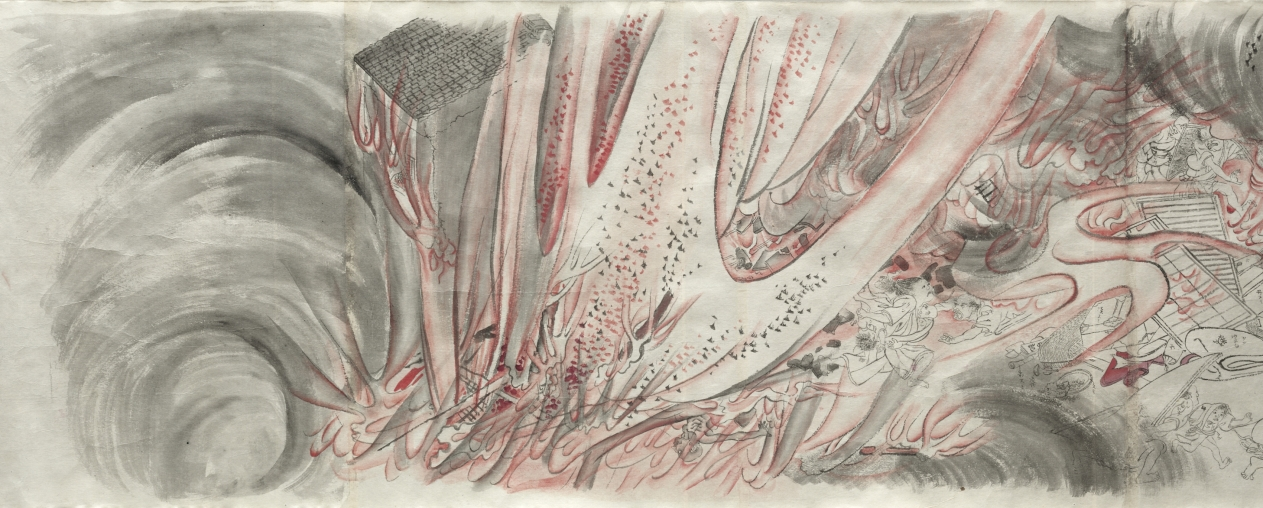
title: Sketch Copy of Natural Disasters, from the Seven Fortunes and Misfortunes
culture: Japan, Edo period (1615–1868) to Meiji period (1868–1912)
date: after 1773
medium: handscroll; ink and color on paper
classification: Painting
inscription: Signed: Gettcho; dated 1773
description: This unmounted handscroll is a copy of the first of a three-scroll set painted by Maruyama Ōkyo (1733–1795) for Buddhist monk Yujō (1723–1773). It depicts people's unfortunate encounters with forces of nature from wind to beasts. Ōkyo's realistic, contemporary imagery was meant to evoke a sense of recognition and empathy in viewers, shocking them into avoidance of possible punishments.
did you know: Notations that appear throughout the scroll indicate colors and other details of the original painting.